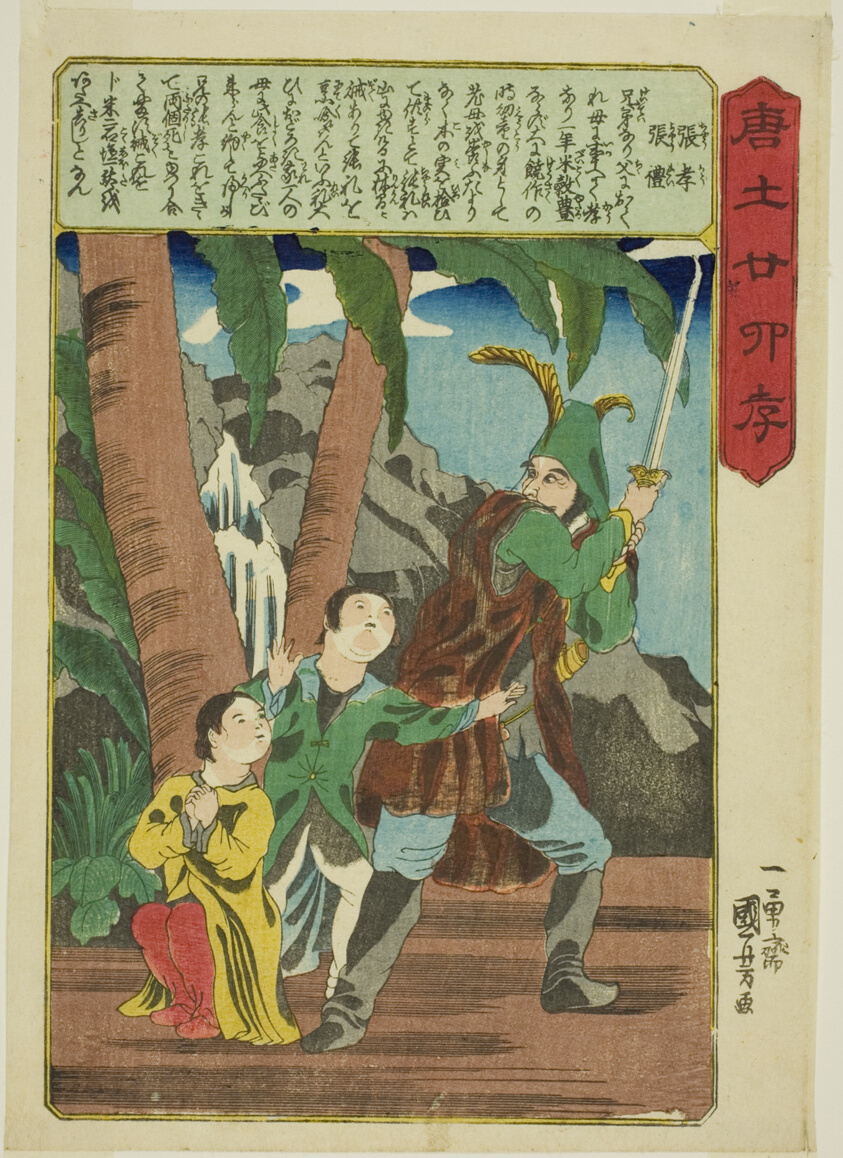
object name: Print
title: Zhang Xiao and Zhang Li (Cho Ko, Cho Rei), from the series "Twenty-four Paragons of Filial Piety in China (Morokoshi nijushiko)"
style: Japanese (culture or style)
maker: Utagawa Kuniyoshi (Japanese, 1797-1861)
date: c. 1848/50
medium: Color woodblock print; chuban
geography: Japan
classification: woodblock print; print; asian art